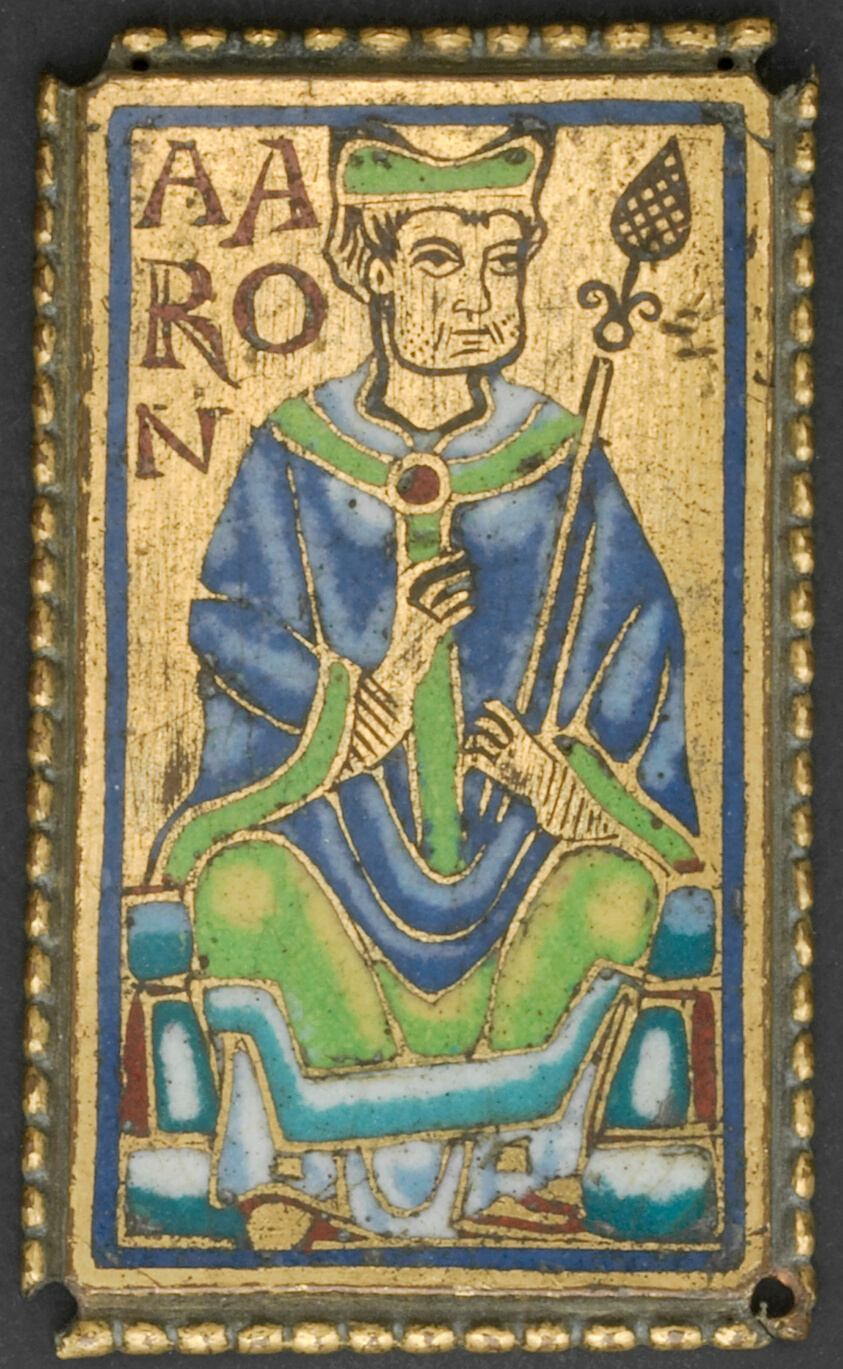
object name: Decorative Arts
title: Plaque with Aaron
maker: German (Rhineland) or French (Troyes)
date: 1160/80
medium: Gilded copper, champlevé enamel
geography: Meuse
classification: enamel; european decorative arts; decorative arts